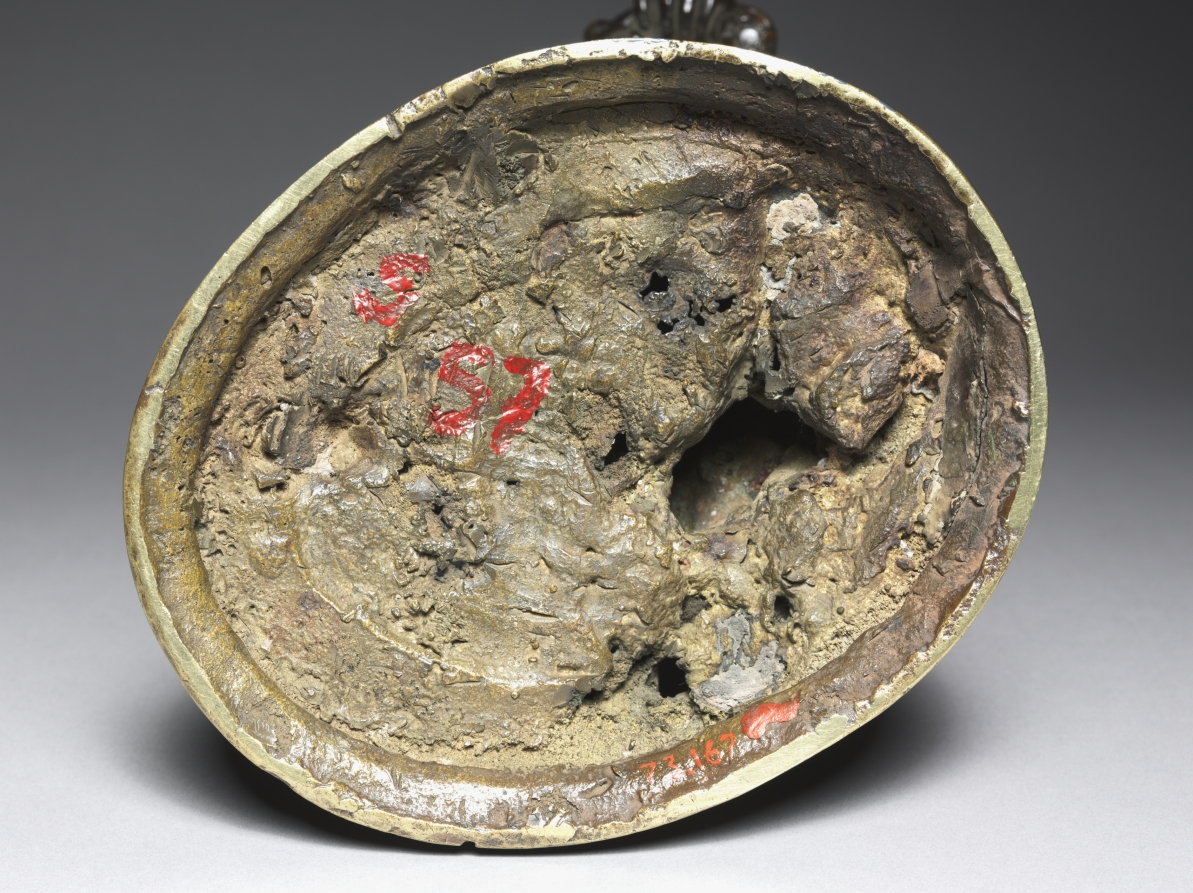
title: Hercules and the Hydra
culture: Northern Europe, late 16th-early 17th century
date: late 1500s-early 1600s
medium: bronze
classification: Sculpture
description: Hercules slayed the Lernean Hydra as the second of the ancient hero’s twelve labors. When one of the nine snake-like heads was destroyed, two grew back. Hercules cauterized each stump, allowing him eventually to kill the monster. The object he holds may have been a club, sword, sickle, or torch. The sinuous, scaly Hydra and the defined musculature presented challenging opportunities for sculptors working in bronze. The raw, tumultuous energy and twisting form-associated with artists of the late 1500s-contrasts to Jacopo Sansovino’s earlier Virgin and Child (1951.316).